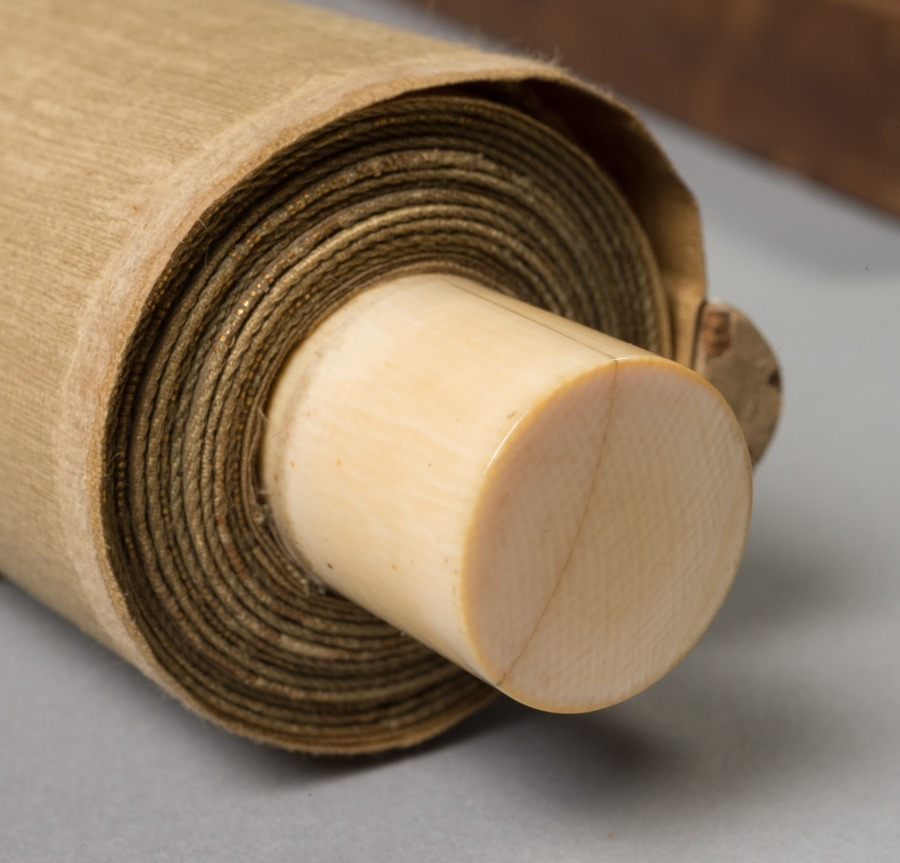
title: Swallows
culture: Japan, Edo period (1615–1868)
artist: Yamaguchi Sekkei (Japanese, 1644–1732)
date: late 1600s–early 1700s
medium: hanging scroll; ink and color on paper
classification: Painting